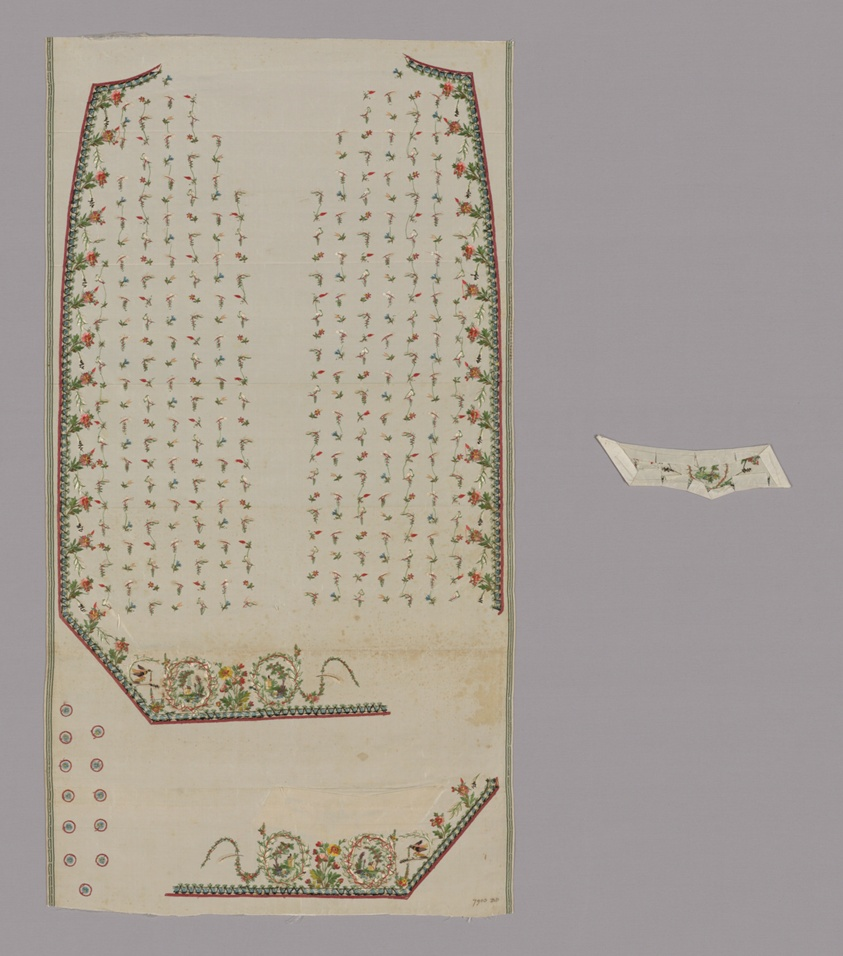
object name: Costume and Accessories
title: Embroidered Fabric for a Man's Waistcoat Front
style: 18th Century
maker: France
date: 1780s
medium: Silk, plain weave; embroidered with silk thread in individual back, outline, running, satin, split and stem stitches; couching; laid work and French knots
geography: France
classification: costume; needlework (visual works); waistcoat (garment); textile; costume - embroidery; needlework - costume; garment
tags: floral motifs, flowers, foliage, white (color), green (color), pink (color), building, floral, bird, wreaths, feathers, fashion, houses